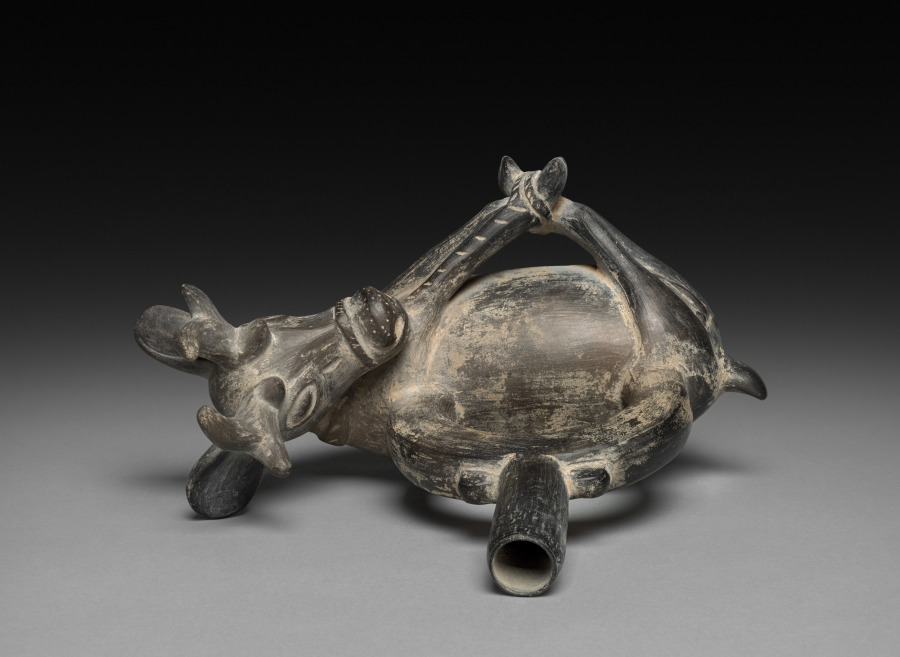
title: Bound Deer Effigy Vessel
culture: Andes, North Coast, Chimú people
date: 1000–1460s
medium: Ceramic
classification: Ceramic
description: This vessel was made by an artist of the Chimú Empire of Peru’s north coast. In the art of the Moche, an earlier culture in the region, the deer had complex symbolism related to ritual combat and the capture of prisoners. A memory of that symbolism may survive here in the binding of the deer’s feet.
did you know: Chimú potters fired their vessels in an atmosphere of reduced oxygen to achieve a uniform black surface.